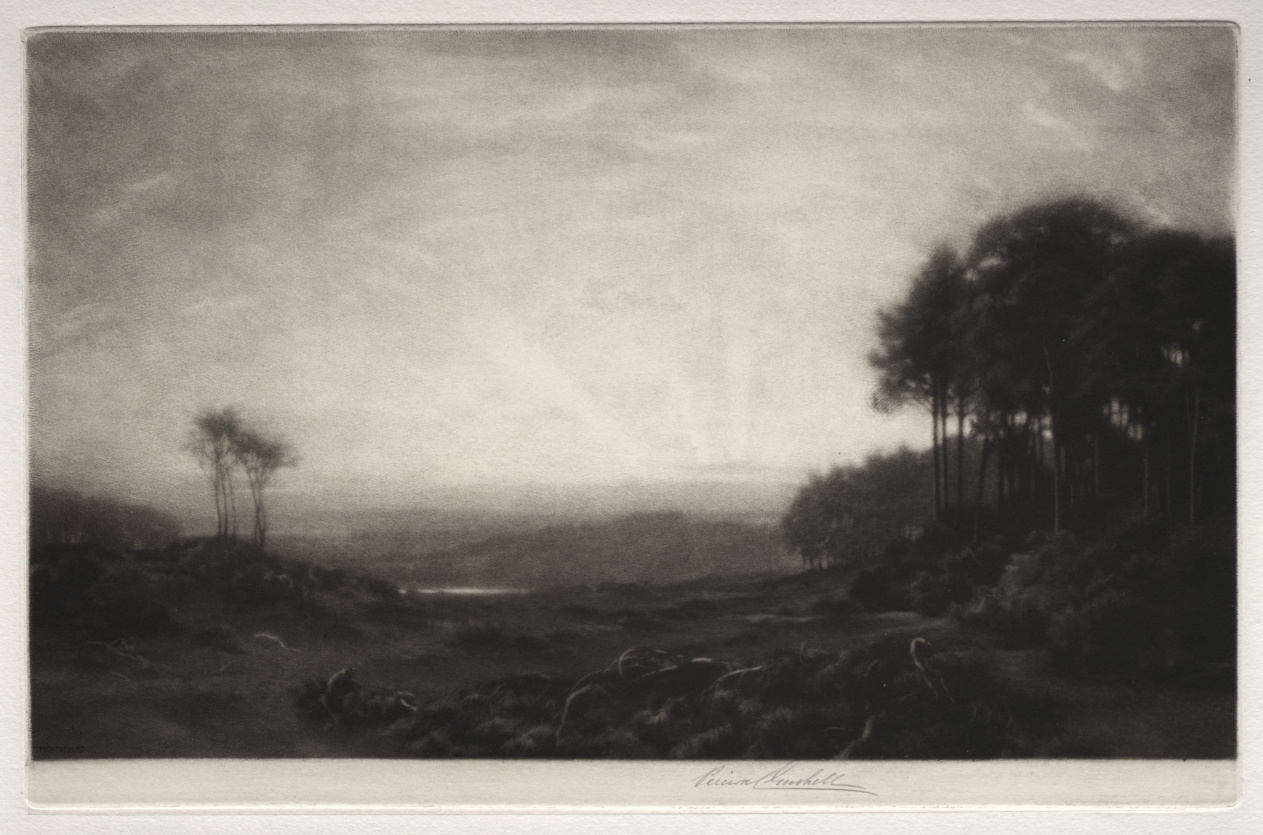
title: Sunrise in the Clearing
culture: England, 20th century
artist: George Percival Gaskell (British, 1868–1934)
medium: mezzotint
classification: Print